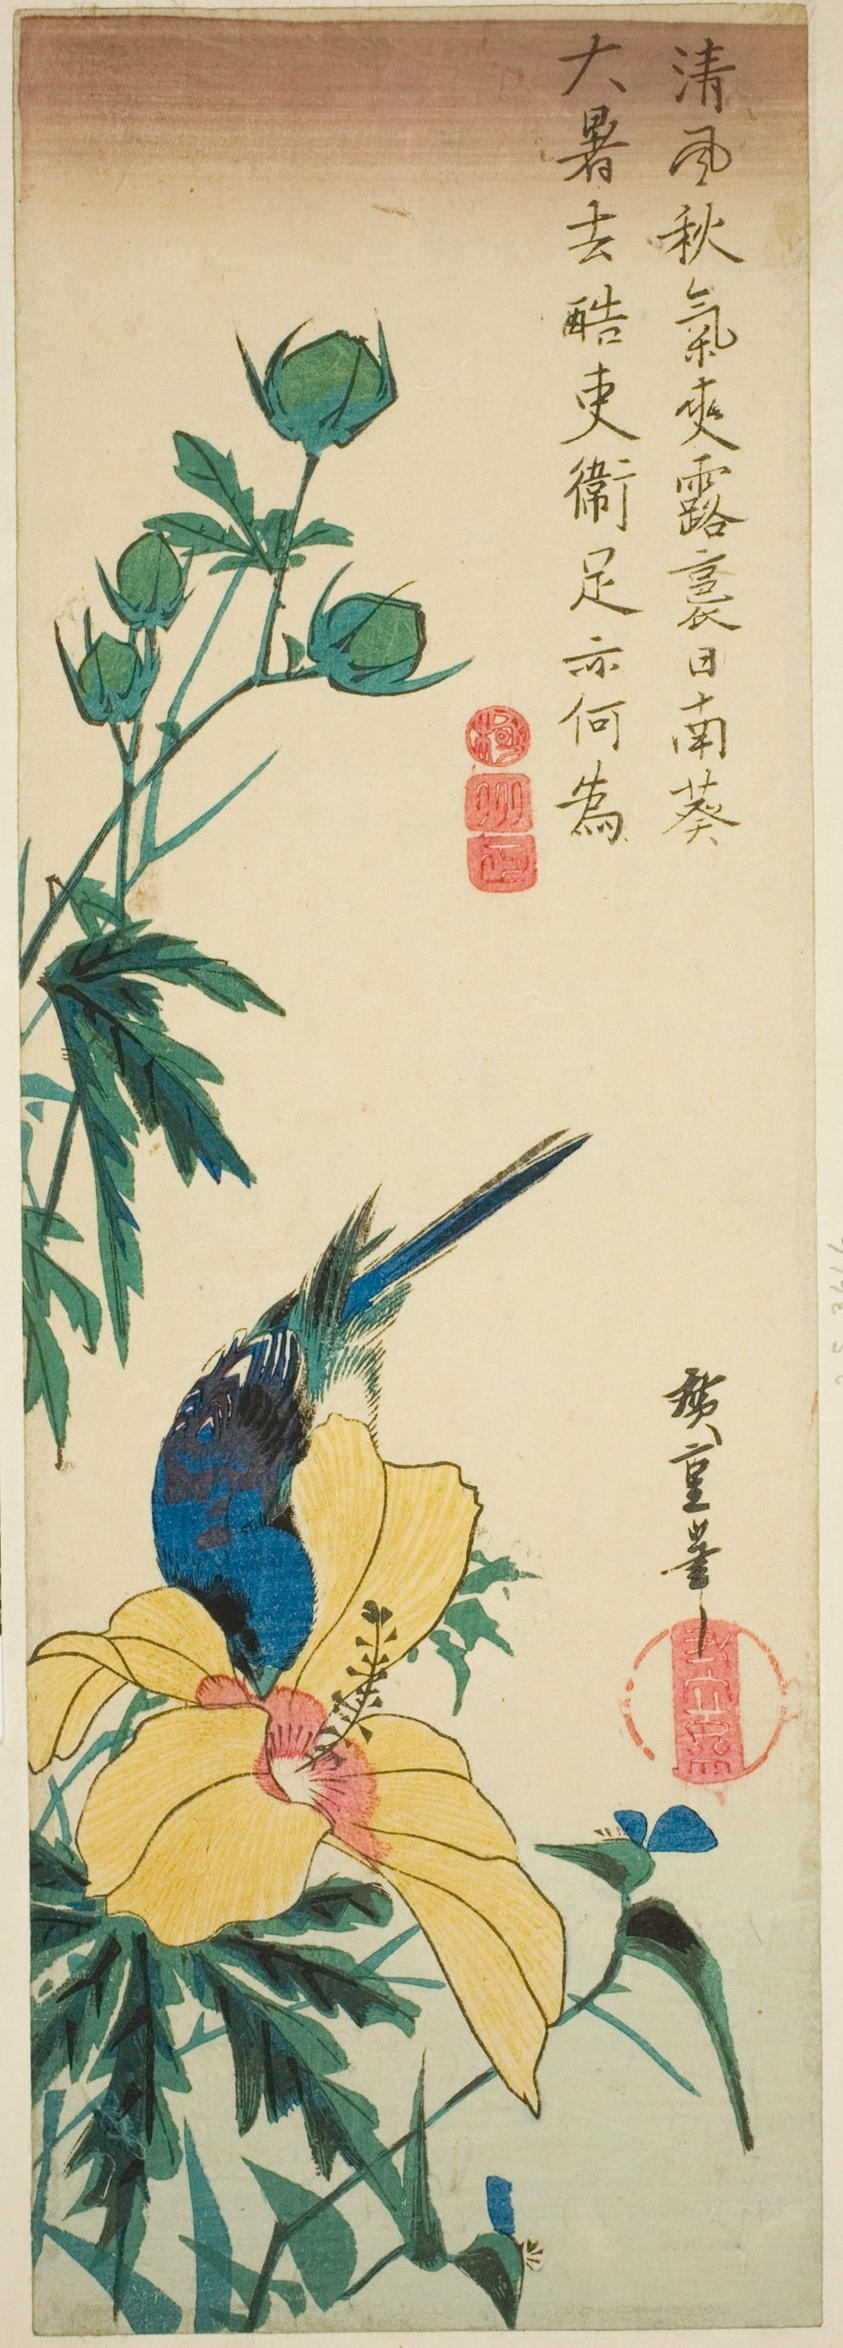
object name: Print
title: Blue bird and hibiscus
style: Japanese (culture or style)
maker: Utagawa Hiroshige 歌川 広重; Japanese, 1797-1858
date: 1830s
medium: Color woodblock print; chutanzaku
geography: Japan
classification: woodblock print; print; asian art